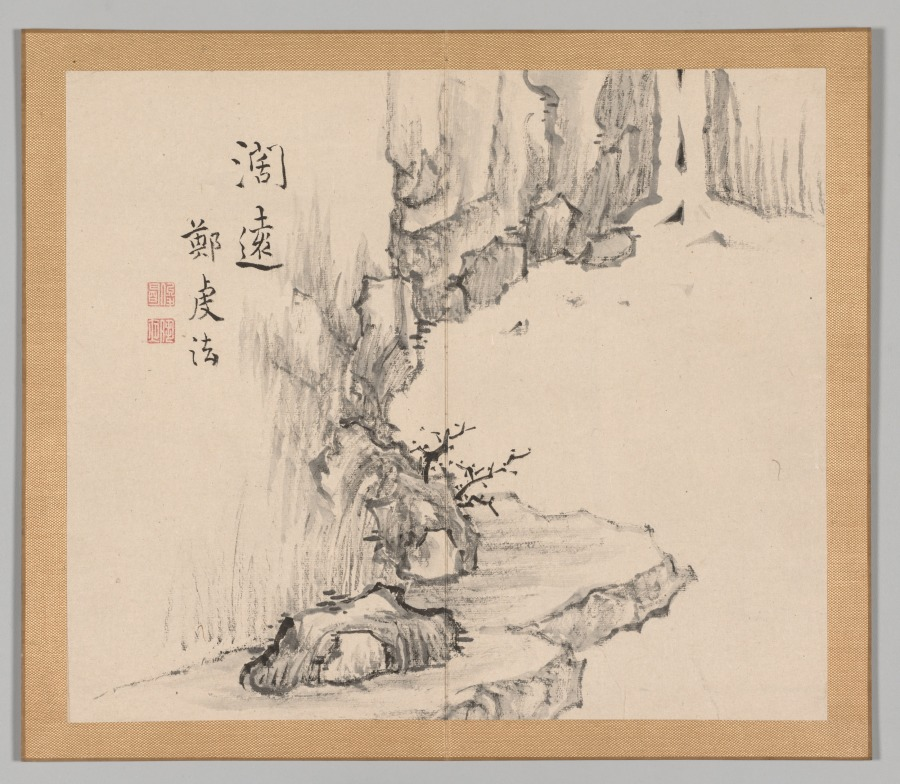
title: Reverberations of Taiga, Volume 2 (leaf 4)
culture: Japan, Edo period (1615–1868)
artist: Aoki Shukuya (Japanese, d. 1802)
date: mid- to late 1700s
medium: double-leaf from a pair of albums; ink and light color on paper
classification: Portfolio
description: Traditionally, young painters in Japan began their studies with an established master-painter. The master's compositions invariably became models that the apprentice copied to learn various ink and brush techniques. Shukuya was a pupil of the famous Kyoto artist Ikeno Taiga, whose style is reflected in these sketches of rocks, trees, and mountains.